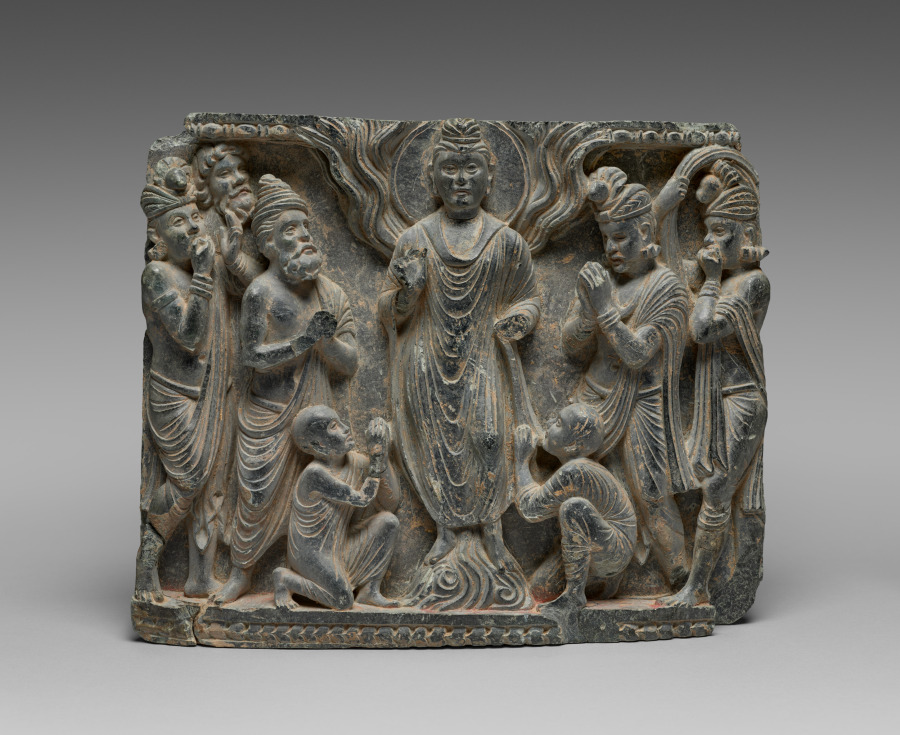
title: The Great Miracle at Shravasti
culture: Pakistan, Gandhara, Peshawar Valley, early Kushan period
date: c. 100 CE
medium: schist with traces of gold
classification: Sculpture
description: After the Buddha reached enlightenment, he spent the remainder of his life traveling around northeastern India, giving teachings and performing miracles in order to convert followers and establish the Buddhist community. One of his most famous miracles is when he levitated and caused fire to leap from his shoulders and water to flow from his feet. The figures of two monks kneel in worship. Others press their hands together in a sign of devotion and submission, while the figures on the outer edges whistle and shake their upper garments, as was customary when an amazing sight was seen.